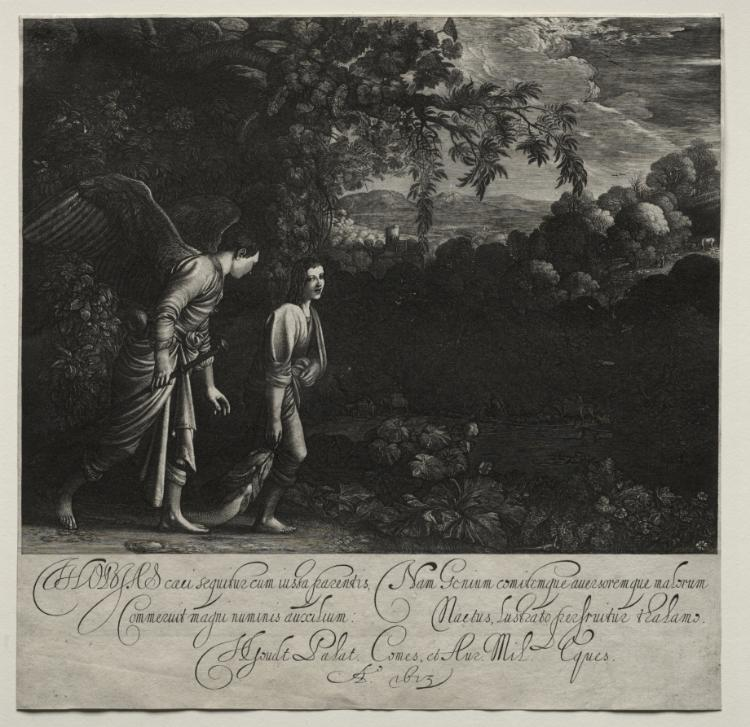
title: Tobias and the Angel (large plate)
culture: Netherlands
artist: Hendrik Goudt (Dutch, 1583–1648)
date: 1613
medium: engraving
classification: Print